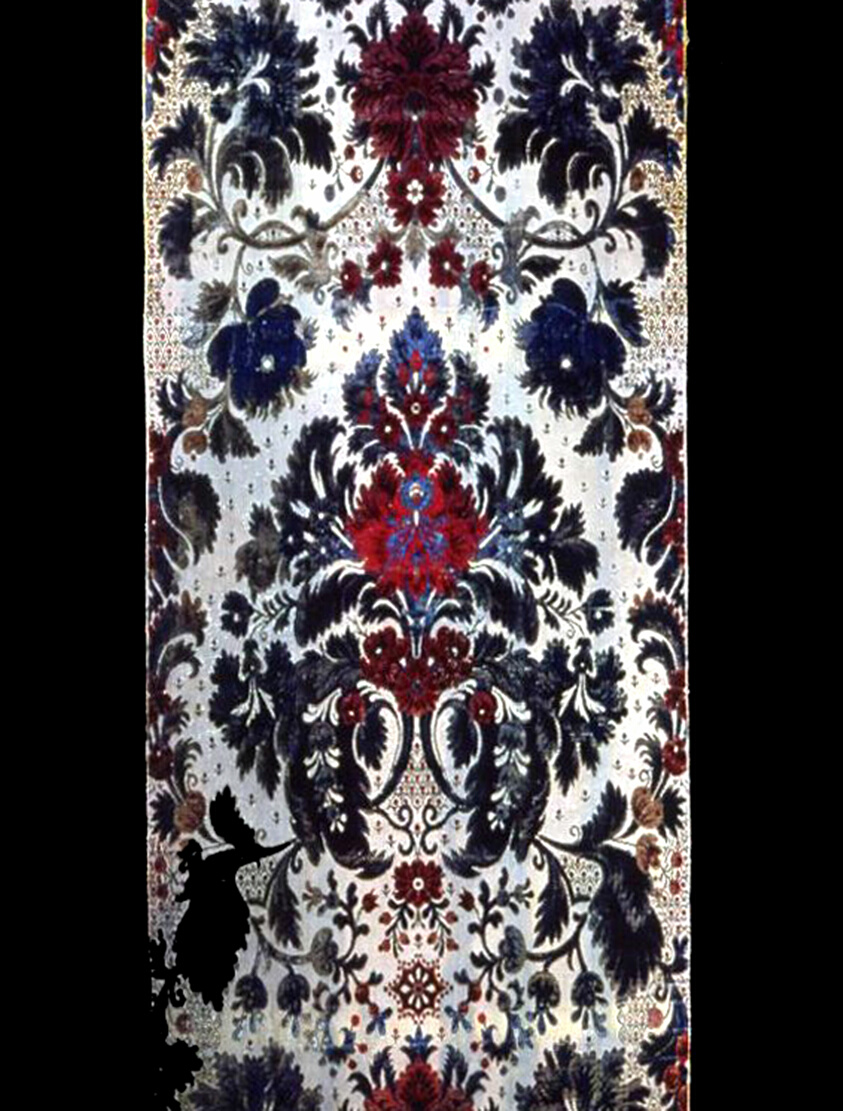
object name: Textile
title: Panel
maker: France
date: c. 1880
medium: Silk and cotton, plain weave with gilt-metal strip supplementary facing wefts and two-color supplementary pile warps forming cut and uncut voided velvet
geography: France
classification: textile; weaving - velvet; weaving